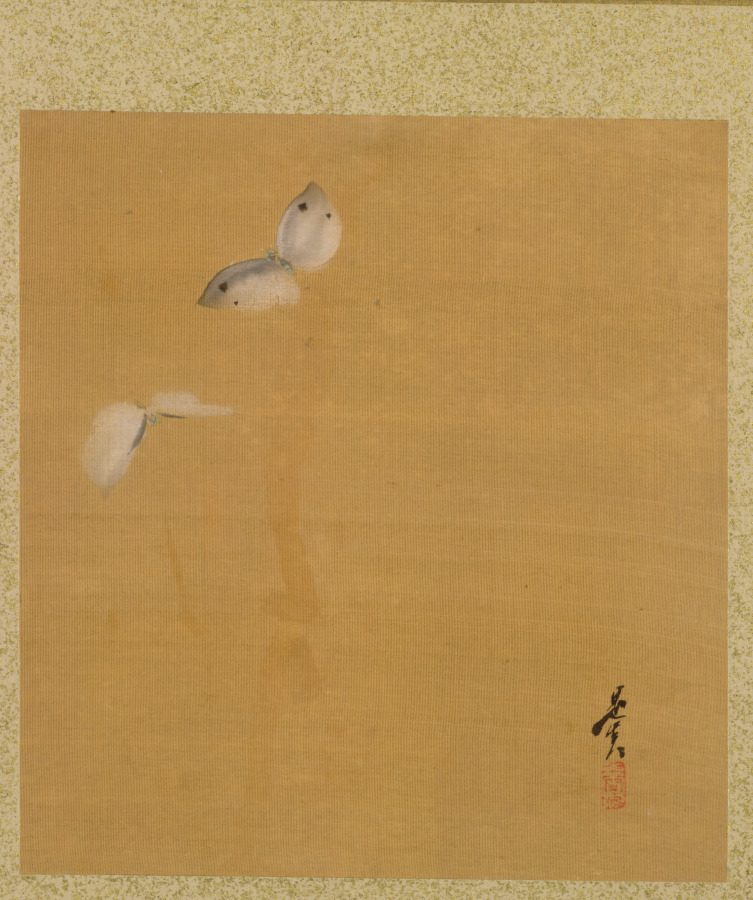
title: Moths from Album of Paintings by the Venerable Zeshin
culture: Japan, Edo period (1615–1868)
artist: Shibata Zeshin (Japanese, 1807–1891)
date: 1847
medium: leaf in accordion-style album; ink, color, and gold on silk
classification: Bound Volume